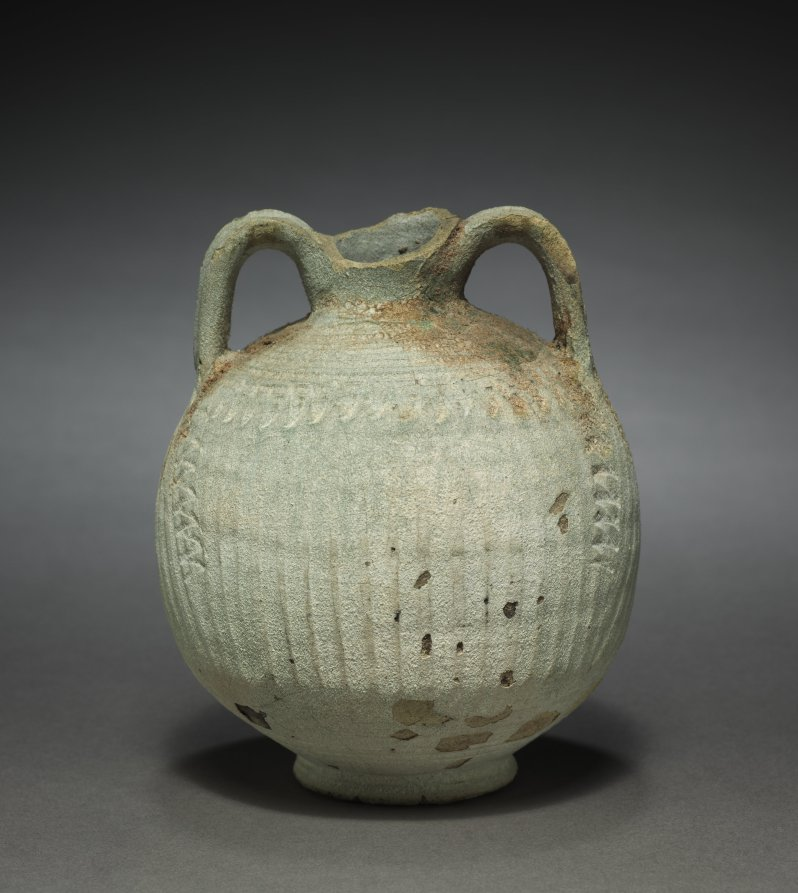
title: Jar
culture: Parthian Empire (247 BCE–224 CE)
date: 1–200 CE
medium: terracotta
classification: Ceramic